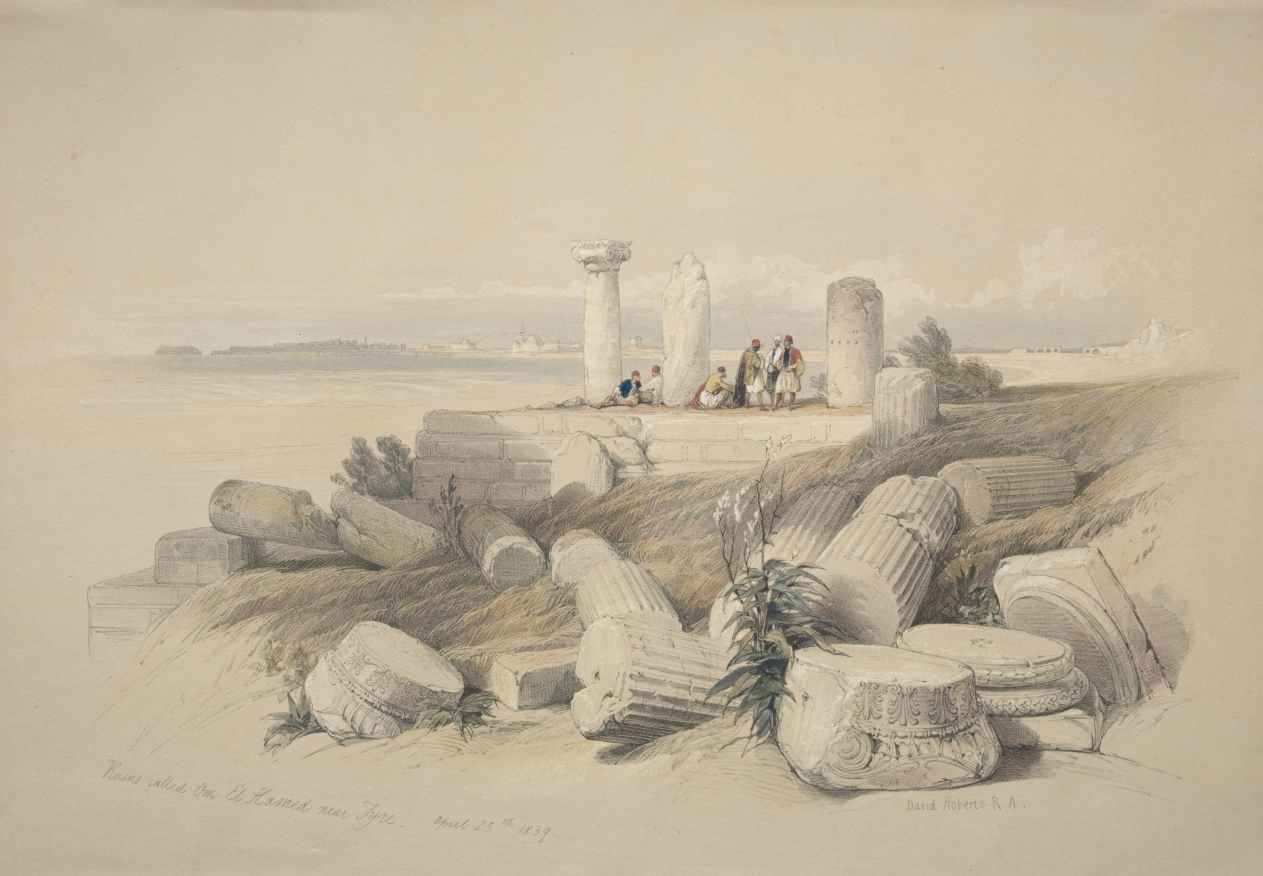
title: Ruins Called Om El Hamed near Tyre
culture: England, 19th century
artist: David Roberts (Scottish, 1796–1864)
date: 1839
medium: color lithograph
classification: Print